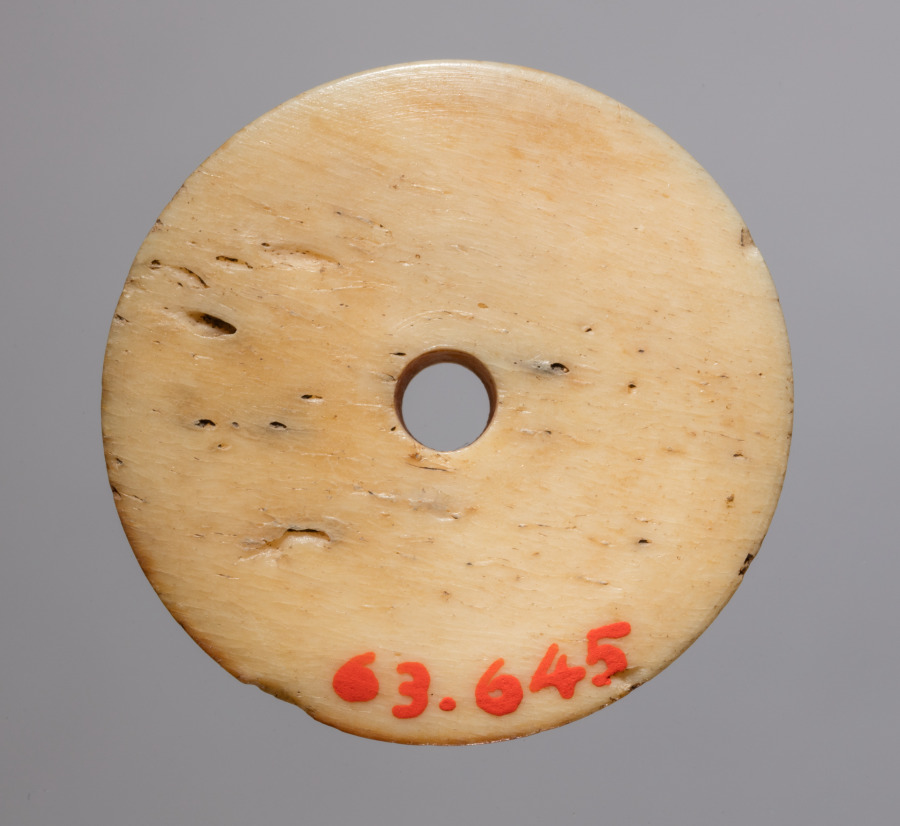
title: Spindle Whorl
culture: Iran, early Islamic period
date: 700s - 900s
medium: bone, incised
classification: Spindle Whorl